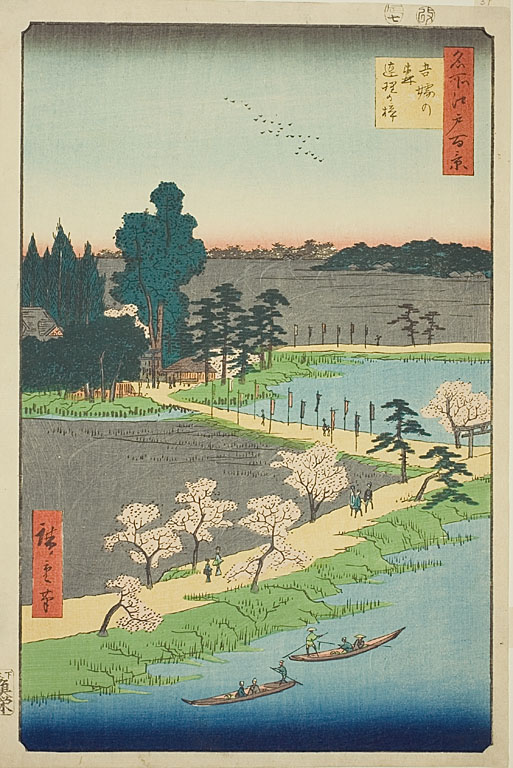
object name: Print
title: The Entwined Camphor Trees at Azuma Shrine (Azuma no mori Renri no azusa), No.31 from the series "One Hundred Famous Views of Edo (Meisho Edo hyakkei)"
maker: Utagawa Hiroshige (Japanese, 1797-1858)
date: 1856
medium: Color woodblock print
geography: Japan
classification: woodblock print; print; asian art